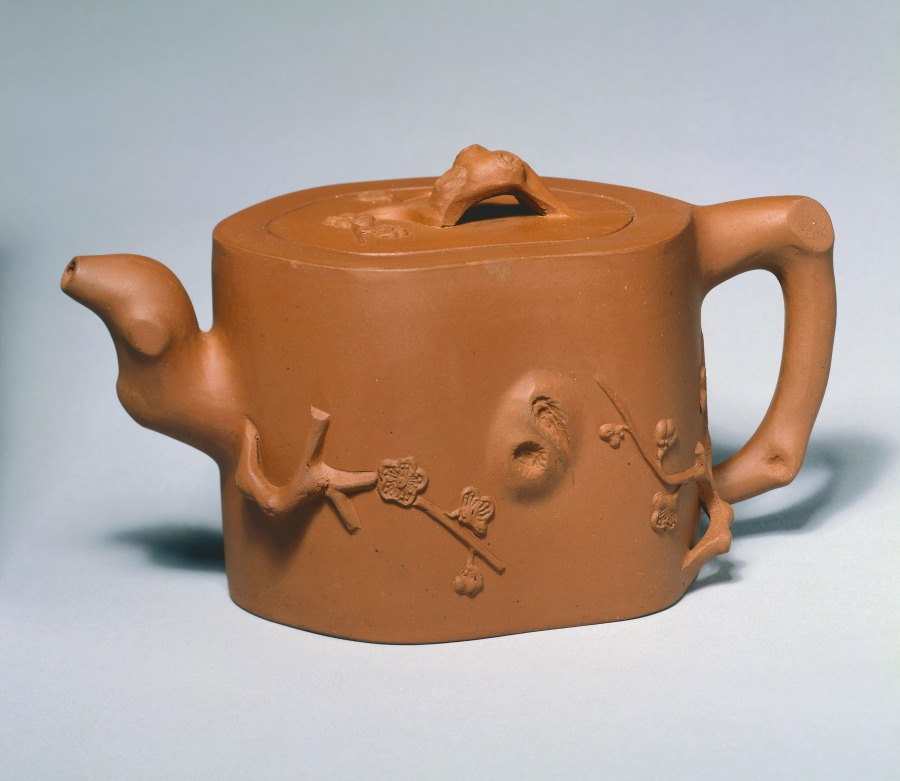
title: Yixing Teapot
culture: China, Qing dynasty (1644-1911)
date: 1800s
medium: stoneware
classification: Ceramic